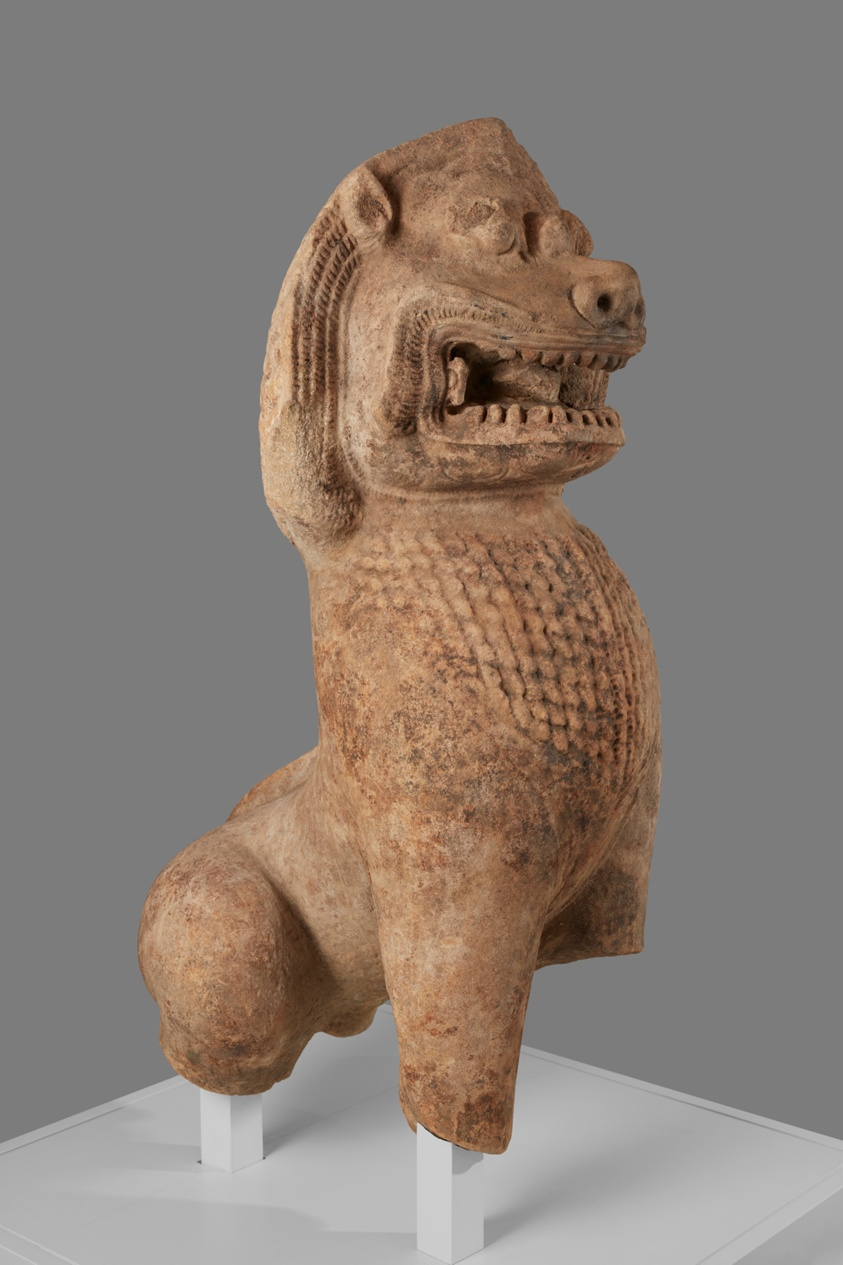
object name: Sculpture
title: Guardian Lion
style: angkorean, cambodian, Southeast Asian, asian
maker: Cambodia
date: Angkor period, 12th century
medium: Sandstone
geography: Cambodia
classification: sandstone; stone; sculpture; asian art